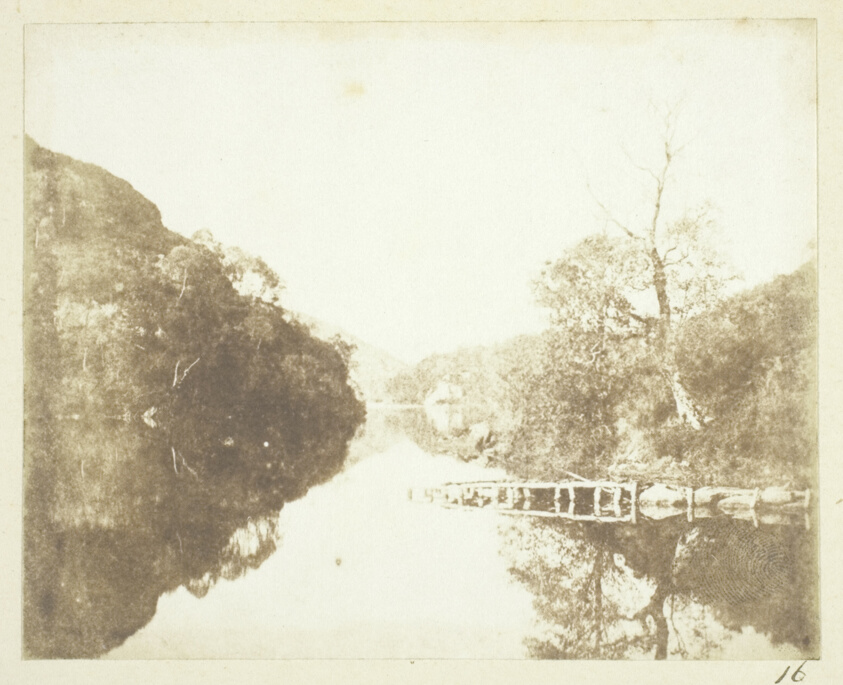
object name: Photograph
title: Scenery of Loch Katrine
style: 19th century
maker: William Henry Fox Talbot (English, 1800–1877)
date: 1844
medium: Salted paper print, plate XVI from album "Sun Pictures in Scotland" (1845)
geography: England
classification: salted paper print; photographic process; photography; photograph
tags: Collected by Hugh Edwards